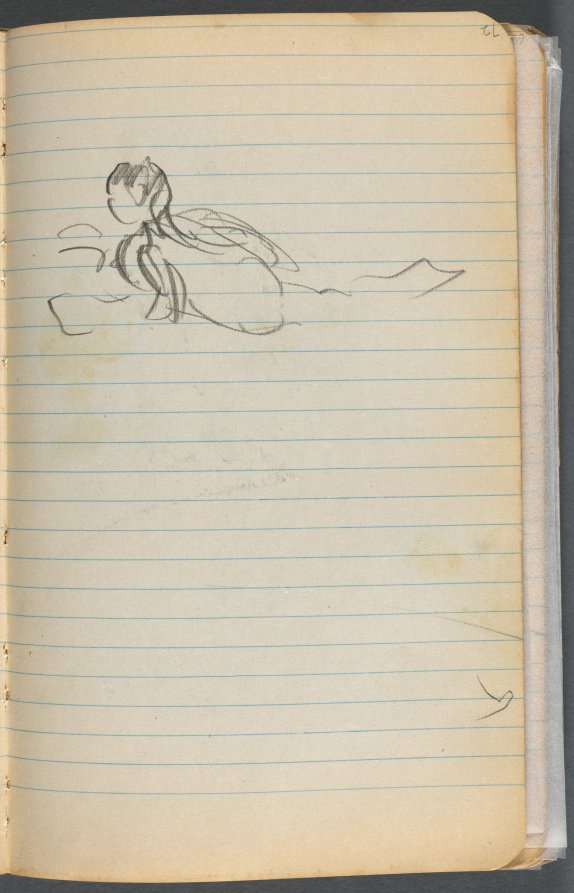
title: Sketchbook, page 072: Swimming Figure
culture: America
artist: Maurice Prendergast (American, born Newfoundland [now Canada], 1858–1924)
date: 1905–10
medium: graphite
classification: Bound Volume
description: This sketchbook contains 69 pages of drawings, a diary largely devoted to the state of the artist's health, and a three-page discourse on the nature of genius and ideas.